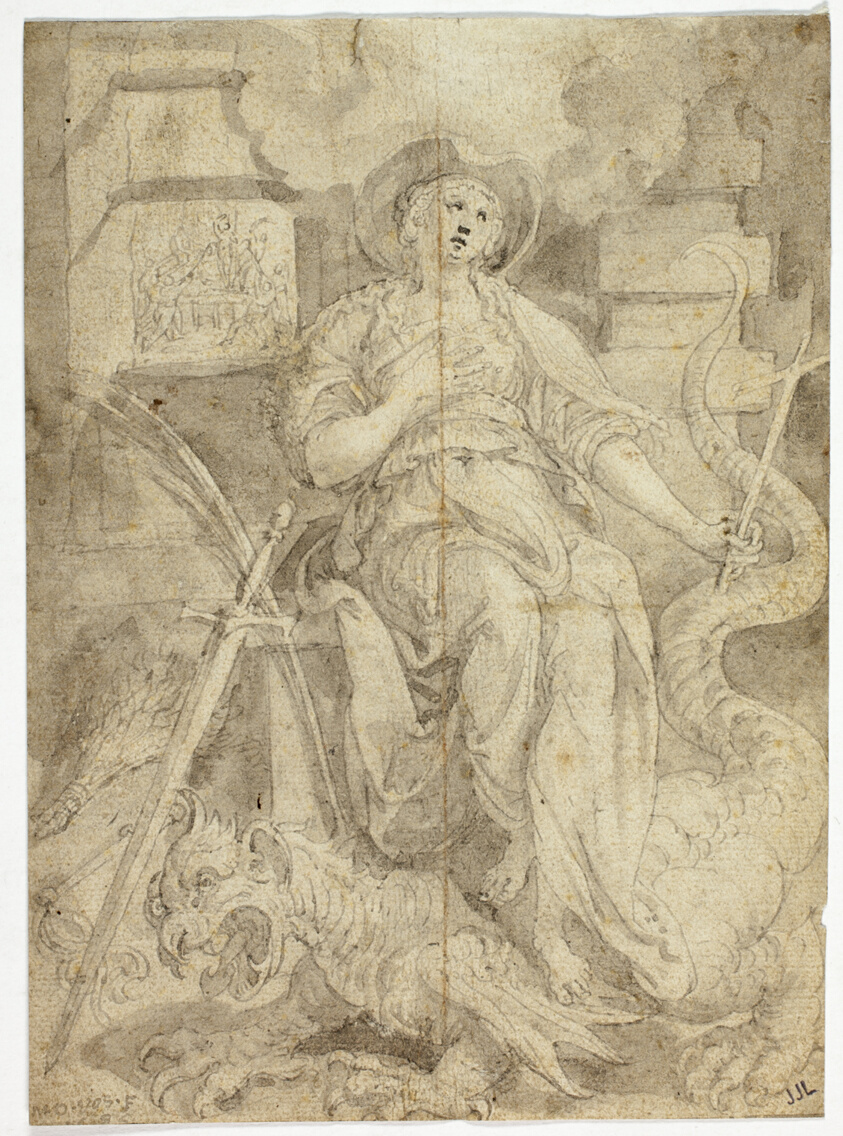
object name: Drawing and Watercolor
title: Study for Saint Margaret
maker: Maerten de Vos; Flemish, 1532-1603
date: c. 1584-1587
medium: Brush and gray wash, over incising, on ivory laid paper, laid down on cream laid paper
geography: Flanders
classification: drawings (visual works); prints and drawing